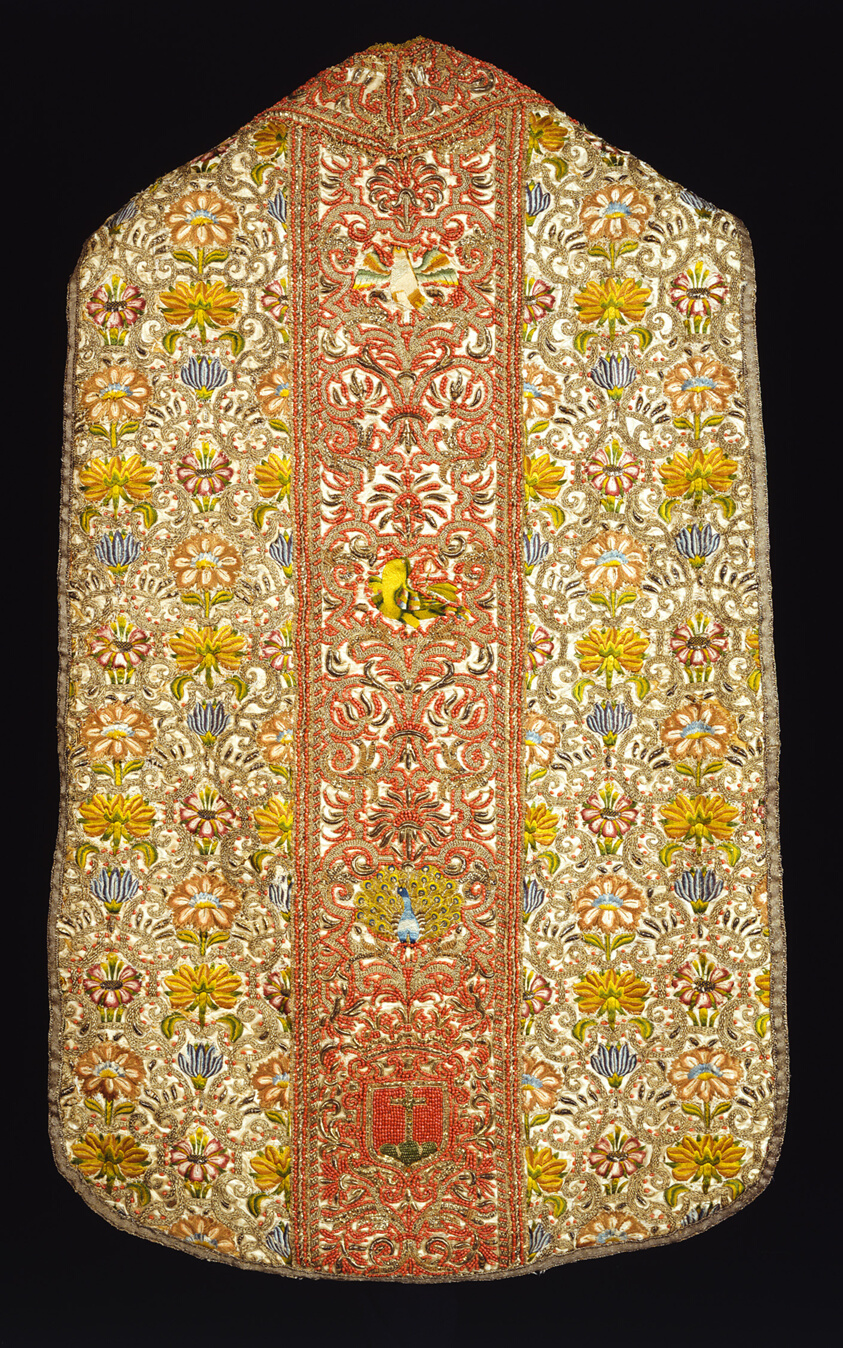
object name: Textile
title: Chasuble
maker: Probably Italy or Sicily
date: 1601/75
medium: Silk, warp-float faced satin weave; underlaid with linen, plain weave; embroidered with linen, silk, gilt-metal strips, and gilt-metal-strip-wrapped silk in satin and split stitches; laid work, couching, padded couching; beaded with coral beads; edged with gilt-metal strip and gilt-metal-strip-wrapped silk, twill and plain weaves; lined with silk, plain weave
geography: Italy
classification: textile; needlework (visual works); liturgical